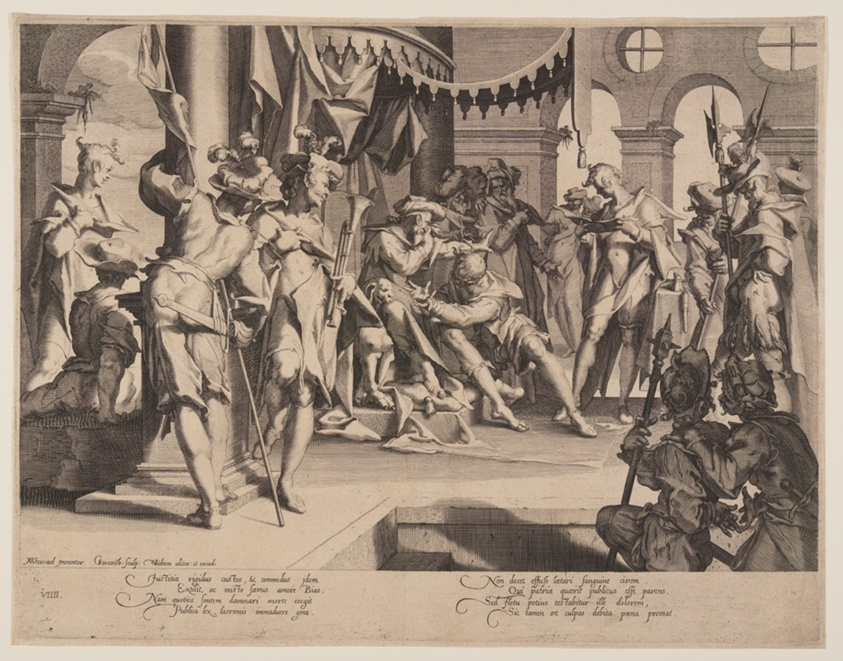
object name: Print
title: Judge Bias Shedding Tears, plate 9 from Thrones of Justice (Thronus Iustitiae)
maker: Willem van Swanenburgh (Dutch, 1580–1612); after Joachim Wtewael (Dutch, 1566–1638)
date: 1606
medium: Engraving on ivory laid paper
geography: Netherlands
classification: print; paper; prints and drawing; engraving